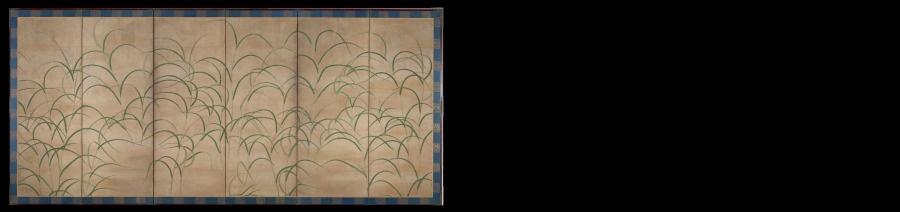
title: Susuki Grass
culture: Japan, Muromachi period (1392–1573)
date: c. 1525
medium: Pair of six-panel folding screens; ink, color, and gold on paper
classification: Painting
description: Susuki grass has a seasonal association with autumn in the Japanese visual and literary tradition. It is one of the “Seven Flowers of Autumn,” along with bush clover, arrowroot, pink, patrinia, mistflower, and bellflower. This composition immerses the beholder in a field of grasses and golden bands of mist. The design may have served as a backdrop for poems brushed in ink on decorated papers and attached to the surface of the screens, a practice with a long tradition in Japan.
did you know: The botanical name for susuki grass is miscanthus.